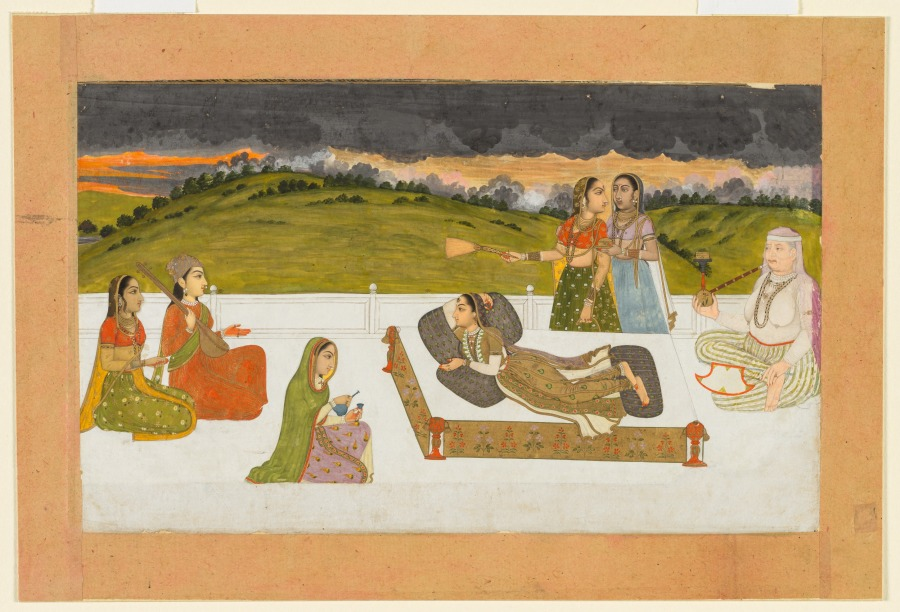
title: A princess reclining on a terrace with attendants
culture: India, Mughal, 18th century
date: c. 1730–1740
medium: Gum tempera and gold on paper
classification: Painting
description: This scene presents an idealized view of the life of a Mughal princess. Bejeweled and dressed in costly garments, she reclines on a couch set up on a white marble terrace. She watches two musicians sing and clap time, and a companion pours for her a cup of liquor. Two attendants stand behind, one waving a whisk to keep away the insects and another holding a box of paan, a betel-leaf preparation for freshening the breath. At the far right an older woman of the harem holds a fan while enjoying a hookah.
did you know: White is the color worn by widows.